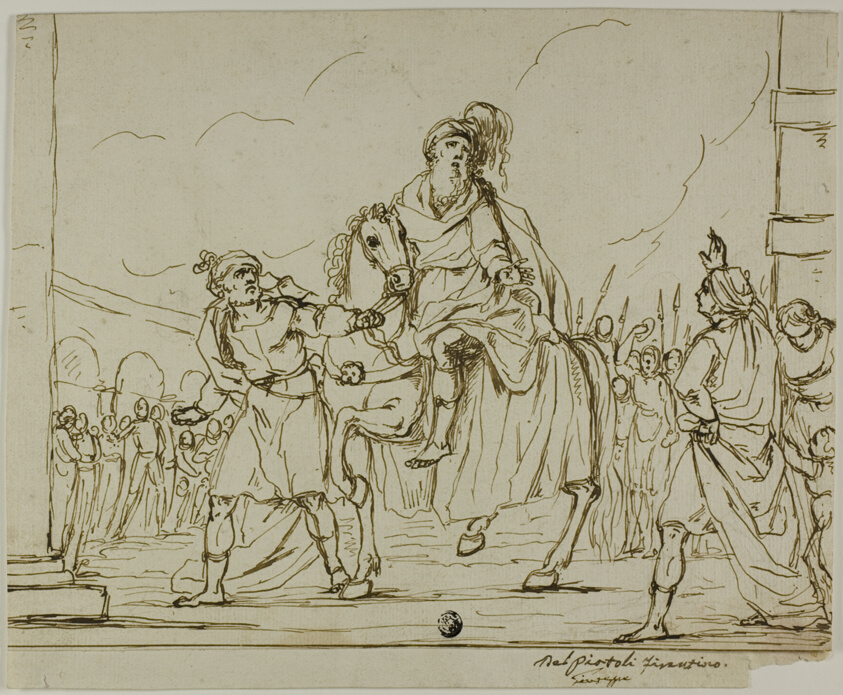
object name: Drawing and Watercolor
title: Triumph of Mordecai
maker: Giuseppe Piattoli (Italian, active 1785-1807)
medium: Pen and brown ink, over traces of black chalk, on ivory laid paper, laid down on ivory laid paper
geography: Italy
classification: pen and ink drawings; drawings (visual works); prints and drawing